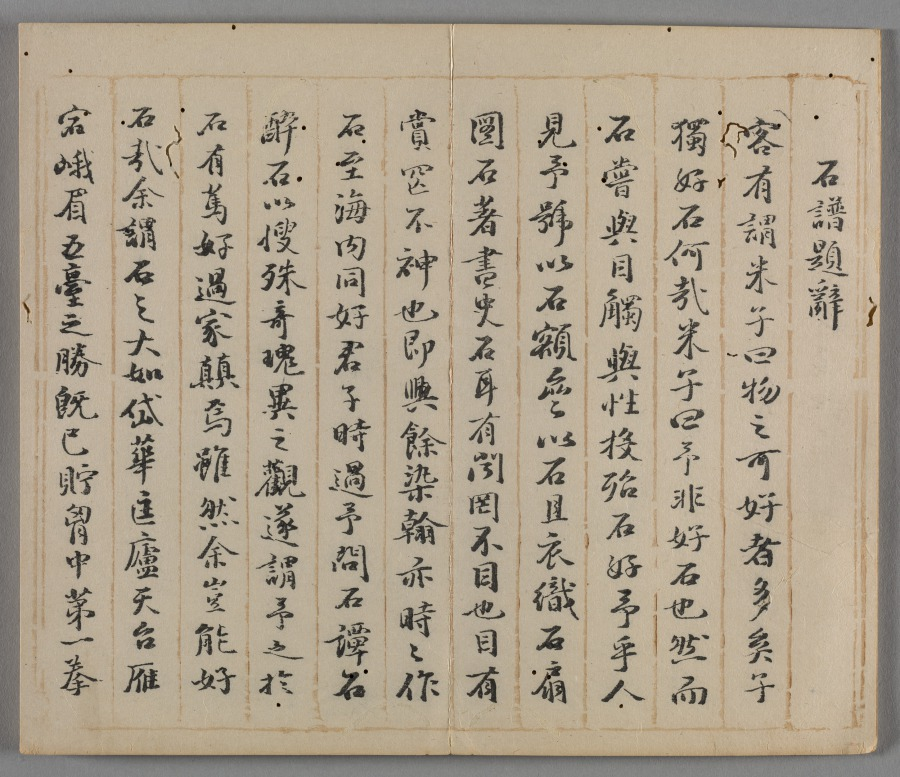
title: Ten Bamboo Studio Painting and Calligraphy Handbook (Shizhuzhai shuhua pu): Rocks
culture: China, Qing dynasty (1644-1911)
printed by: Hu Zhengyan (Chinese, c. 1584–1674)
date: 1633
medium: Woodblock-printed book; ink and colors on paper; first edition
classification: Print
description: Color printing reached a level of perfection in the early 1600s, as seen in this Ten Bamboo Studio Collection of Calligraphy and Painting and the Mustard Seed Garden Manual of Painting (printed 1679 and 1701). The painterly quality, precision in registering (aligning) the woodblocks, and harmonious colors made them the most successful color print editions in Chinese history. Both editions were printed and compiled in Nanjing, spread nationwide, and had a great impact on the arts in Japan and Korea.